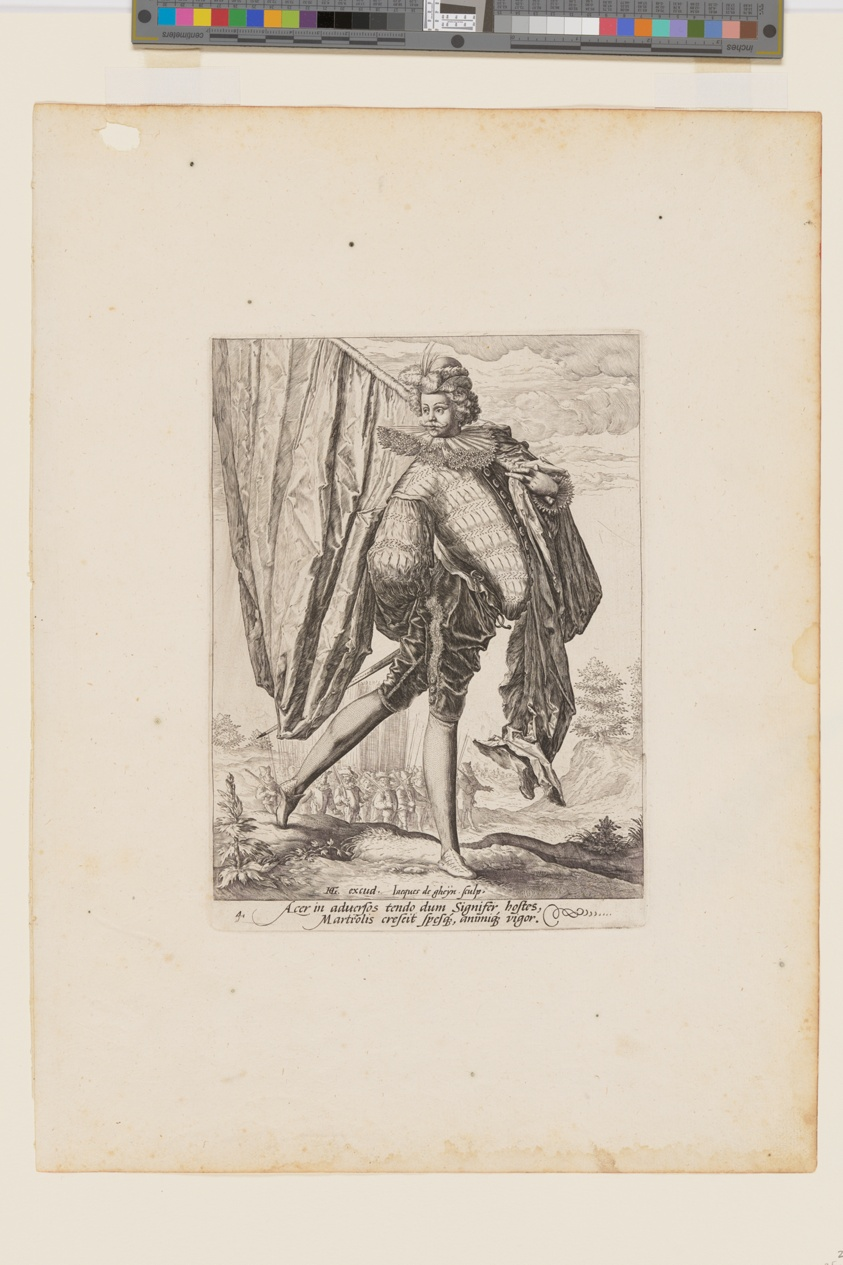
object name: Print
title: Standard Bearer, from Officers and Soldiers of the Bodyguard of Emperor Rudolph II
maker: Jacques de Gheyn II (Dutch, 1565–1629); after Hendrick Goltzius (Dutch, 1558–1617)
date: 1587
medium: Engraving on ivory laid paper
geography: Netherlands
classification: engraving; paper; print; prints and drawing